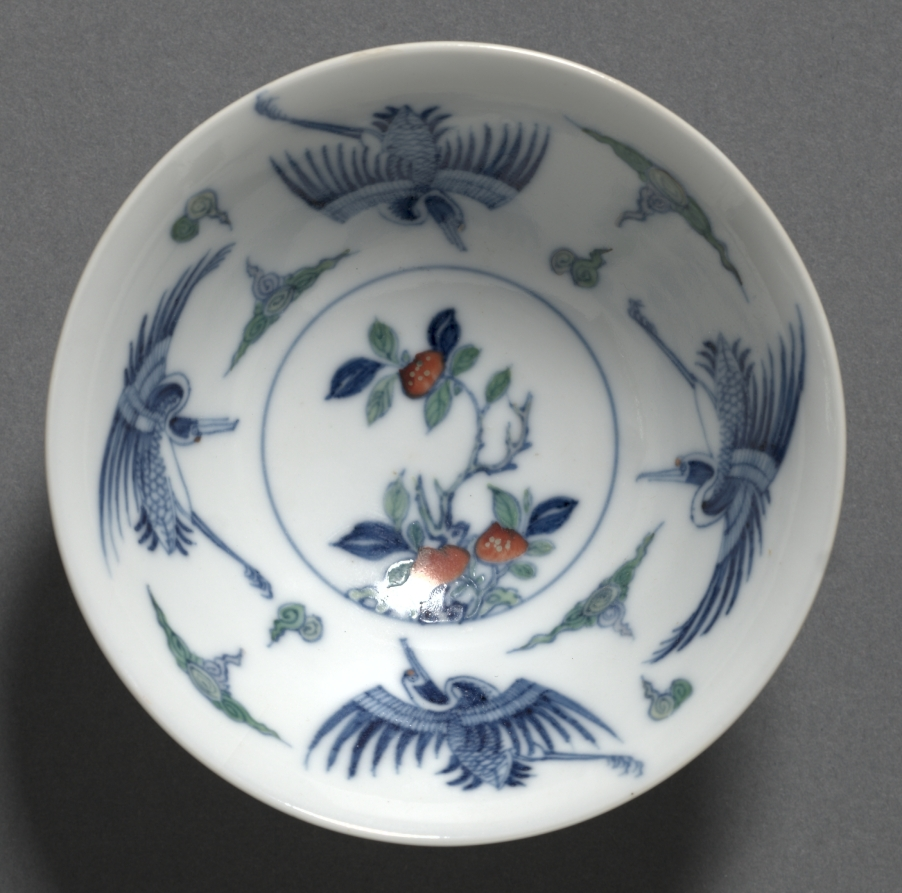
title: Bowl with Flying Cranes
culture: China, Jiangxi province, Jingdezhen kilns, Qing dynasty (1644-1911), Yongzheng mark and reign (1723-35)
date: 1723–35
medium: porcelain decorated in underglaze blue and overglaze enamels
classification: Ceramic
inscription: 大清雍正年制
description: The interior of this small bowl has peaches in the center bordered by stylized cloud forms alternating with cranes in flight. Both cranes and peaches symbolize longevity making this bowl doubly auspicious.